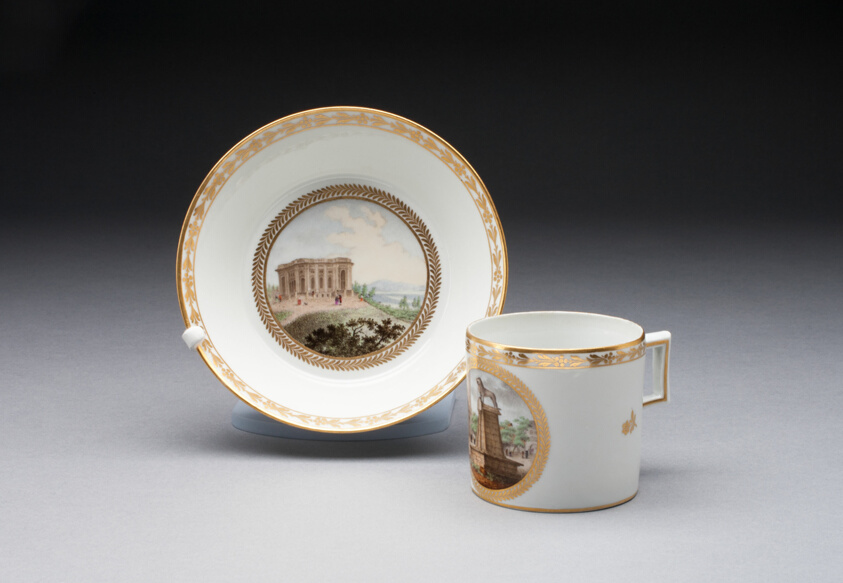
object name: Ceramics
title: Cup and Saucer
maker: Fürstenberg Porcelain Factory (German, founded 1747)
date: Late 18th century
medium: Hard-paste porcelain, polychrome enamels, and gilding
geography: Fürstenberg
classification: drinking vessel; porcelain; european decorative arts; ceramics